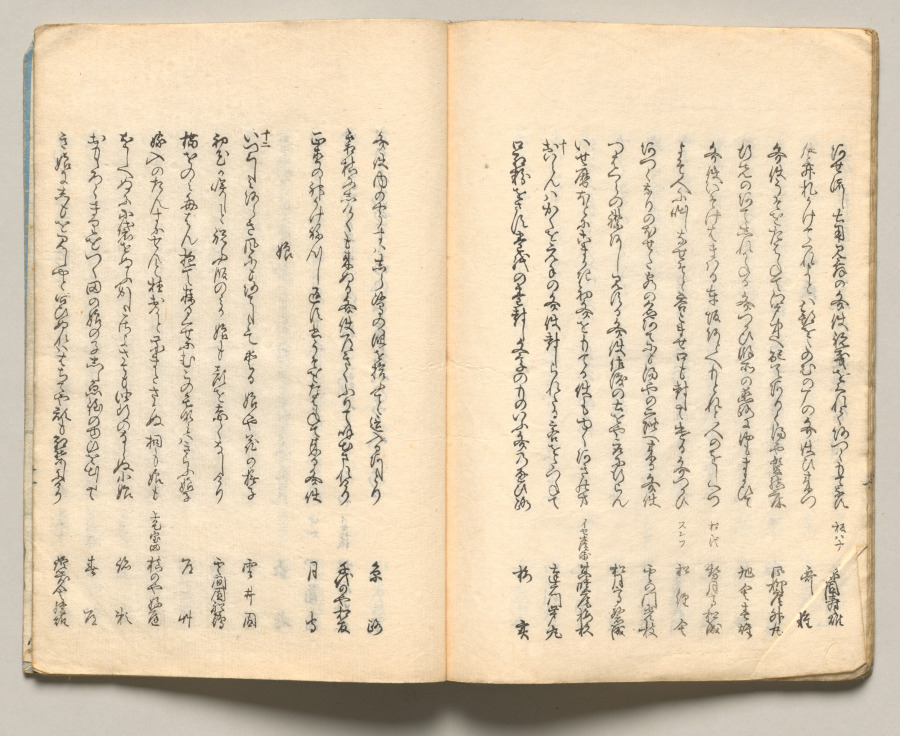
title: Spread Eighteen from Volume Six of People of Japan in Light Verse (Kyōka)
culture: Japan, Edo period (1615–1868)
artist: Utagawa Hiroshige (Japanese, 1797–1858)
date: 1857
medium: Woodblock-printed book; ink and color on paper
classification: Bound Volume